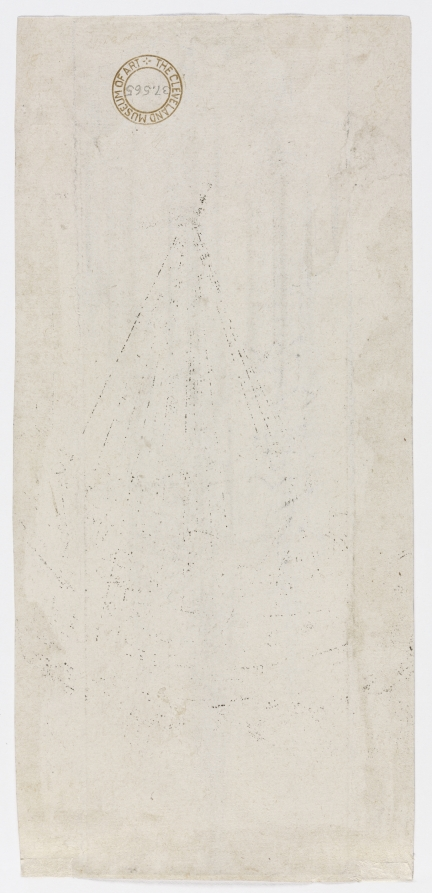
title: Design for a Gothic Fountain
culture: Flanders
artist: Master W with the Key (Netherlandish, active about 1465–1490)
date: c. 1470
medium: engraving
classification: Print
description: Many early engravers used the medium to create motifs for craftsmen. The design for this Gothic fountain calls for the work to be executed in gold or silver and for scented water to spout from the gargoyle heads into the square, carved basins below. Like the great majority of prints by Master W with a Key, this sheet illustrating a design for a fountain is very rare, and only a few impressions are known. Offset on the verso is the faint image of a ship, a subject that inspired eight other engravings.